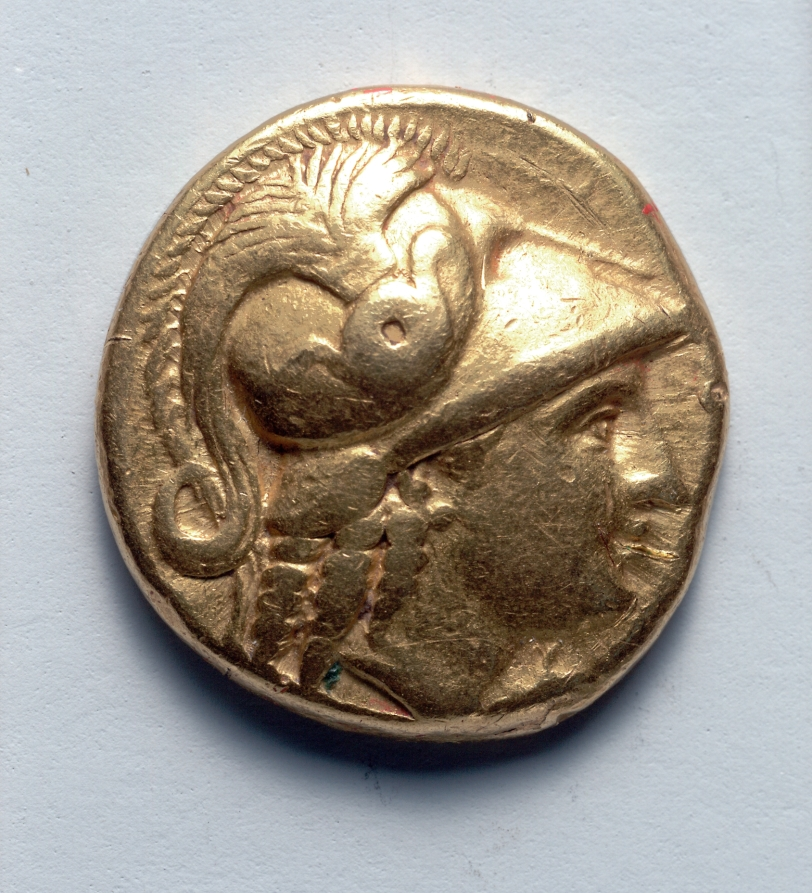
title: Stater: Head of Athena, r., with crested Corinthian helmet, barley left (obverse)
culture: Greek, Macedonian, minted at Abydos (Egypt), reign of Alexander III [The Great}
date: 336–323 BCE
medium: gold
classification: Coins